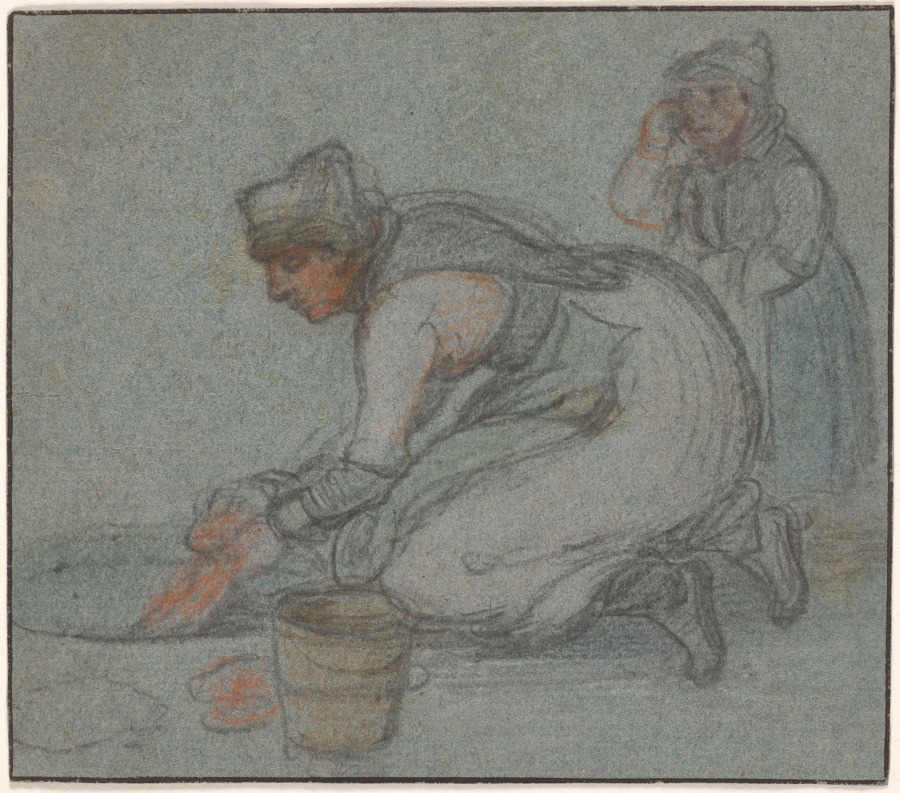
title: A Woman Doing Laundry in an Ice Hole (recto)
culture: Netherlands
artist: Hendrick Avercamp (Netherlandish, 1585–1634)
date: c. 1618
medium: black and red chalk, graphite, watercolor heightened with white on blue paper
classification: Drawing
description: Seventeenth-century Dutch artist Hendrick Avercamp became widely known for his near-exclusive production of winter landscapes, often featuring large crowds made up of different social classes congregated on the Netherlands’ iced canals and rivers and engaged in various activities from ice skating and socializing to doing laundry, fishing, and hauling goods. In this drawing, he sketched a woman squatting to do laundry at a hole in the ice, accompanied by a child who wipes tears from her eyes. On the verso (back) of the same sheet, two men in elegant, middle-class attire appear to be socializing. The artist kept such sheets in his workshop for reference in his larger, multi-figured, finished compositions.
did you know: Though incomplete due to the cut of the sheet, the gestures of the men on the back of this drawing suggest they could be engaged in a game of kolf, a ball and paddle game played on the ice that appears frequently in the artist’s winter scenes.